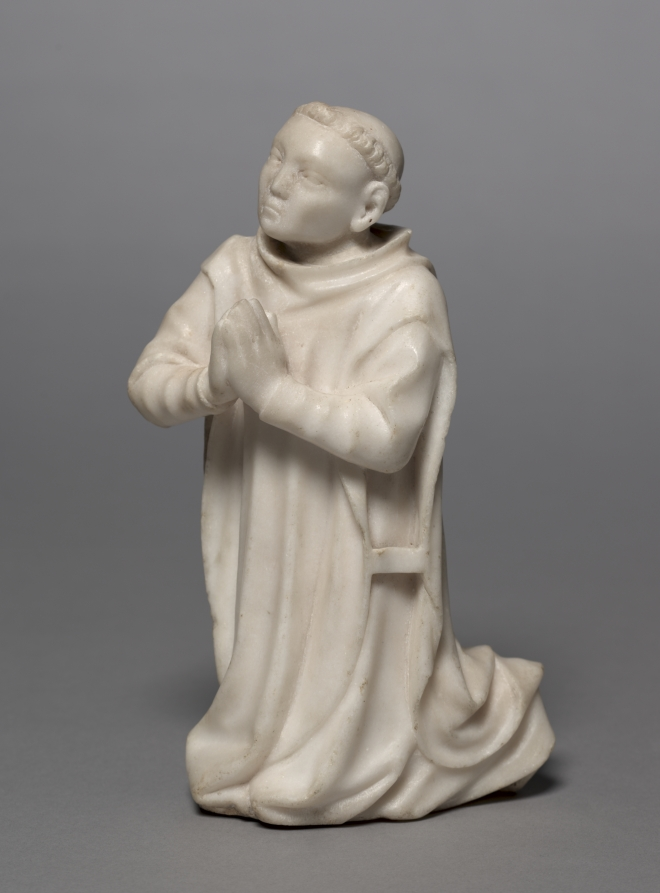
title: Kneeling Carthusian Monk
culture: France, Burgundy, Dijon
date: c. 1380–1400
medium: marble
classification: Sculpture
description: These are the only known surviving sculpted examples of kneeling Carthusian monks. These two figures would have formed part of a private devotional group, probably in a monk’s cell, with a sculpture of the crucified Christ or the Virgin positioned between them. They wear the recognizable white scapular, a hooded garment with front and back panels tied together with a tab.